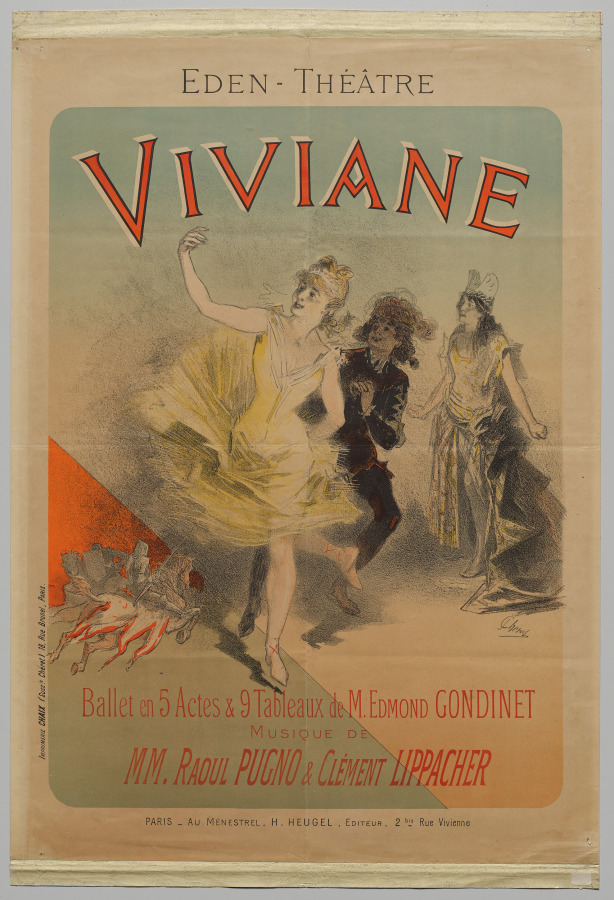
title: Viviane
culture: France, Paris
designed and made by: Jules Chéret (French, 1836–1932)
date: 1886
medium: color lithograph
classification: Print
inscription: Top: Eden Théâtre Bottom: Ballet en 5 actes & 9 Tableaux de N. Edmond Gondinet. Musique de M.M. Raoul Pugno and Clément Lippacher...